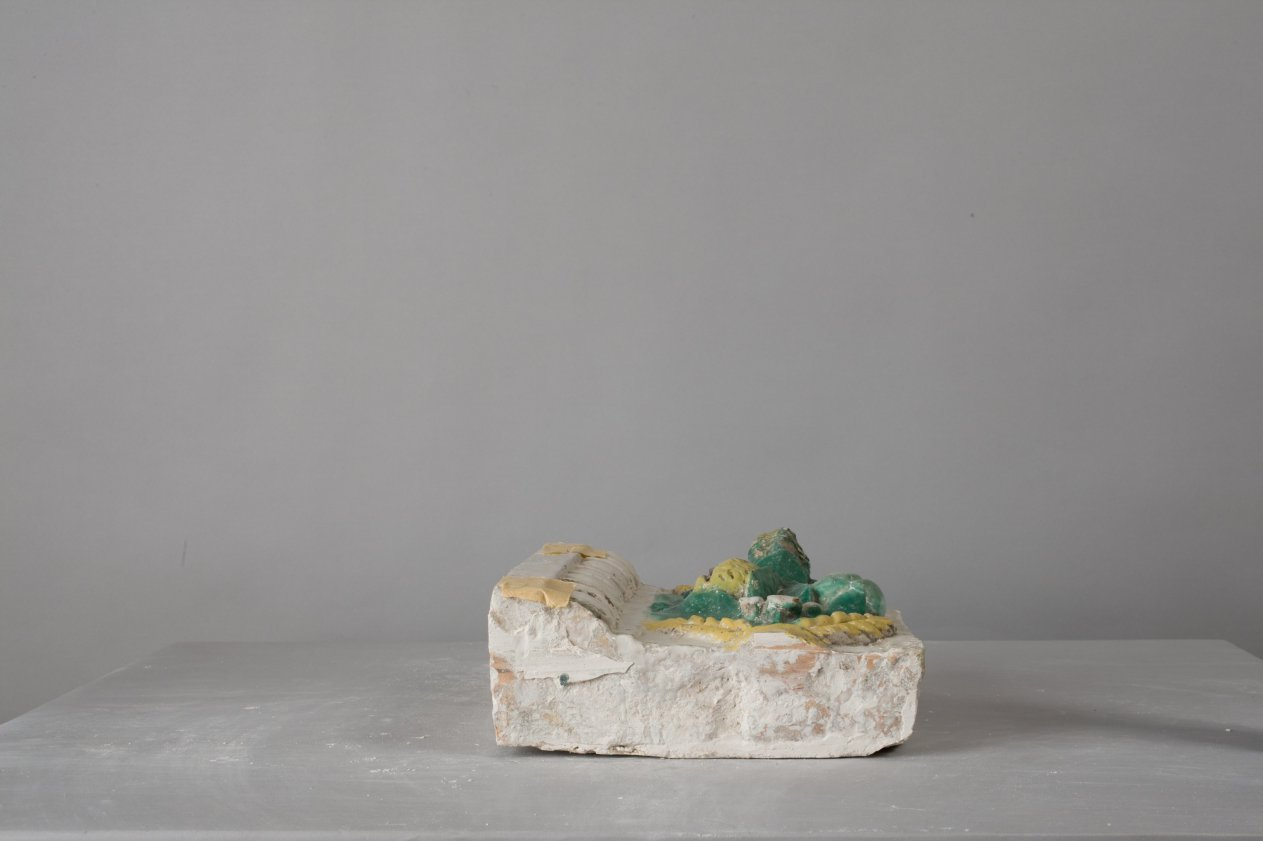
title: Fragment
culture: Italy, Florence, 16th century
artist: Benedetto Buglioni (Italian, 1461–1521)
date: c. 1900–1910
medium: glazed terracotta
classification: Sculpture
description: The Madonna sits upon a throne with the Christ Child standing on her knee. He is steadied by his mother, turning delicately to grasp the Virgin's robe for support. On the left is St. Francis, identified by his stigmata. On the right, St. Anthony Abbot is identified by his monk's robe and T-shaped walking stick. The brown robes of the saints, the purple of the Virgin's tunic (a shade characteristic of the artist), and the flesh tones of the figures contrast strongly against the bright blue background. In the semicircular sky behind the figures, three winged cherub heads emerge, representing a host of angels. The inclusion of St. Francis in this altarpiece honors the saint, suggesting that the altarpiece may have been originally built into the wall of a Franciscan institution in Tuscany. Two shields bearing the Borgherini family crest appear in the lower portion of the altarpiece's border, further suggesting that the chapel for which this altarpiece was made was likely owned or endowed by the family. Glazed terracotta is both durable and decorative and the gleaming white of this piece would have stood out in the darkness of a church. The medium was made popular by Renaissance artist Luca della Robbia and came into fashion as a substitute for expensive carved marble. A rounded arch frame embellished with fruit and flower garlands as well as egg-and-dart and cord moldings accompanied the work when it was acquired, but was later determined not to be original and removed. Buglioni's work bears the influence of the della Robbias, particularly in the simple color scheme. Buglioni likely worked in the studio of Luca's nephew, Andrea, where he would have learned the technique of glazing terracotta.